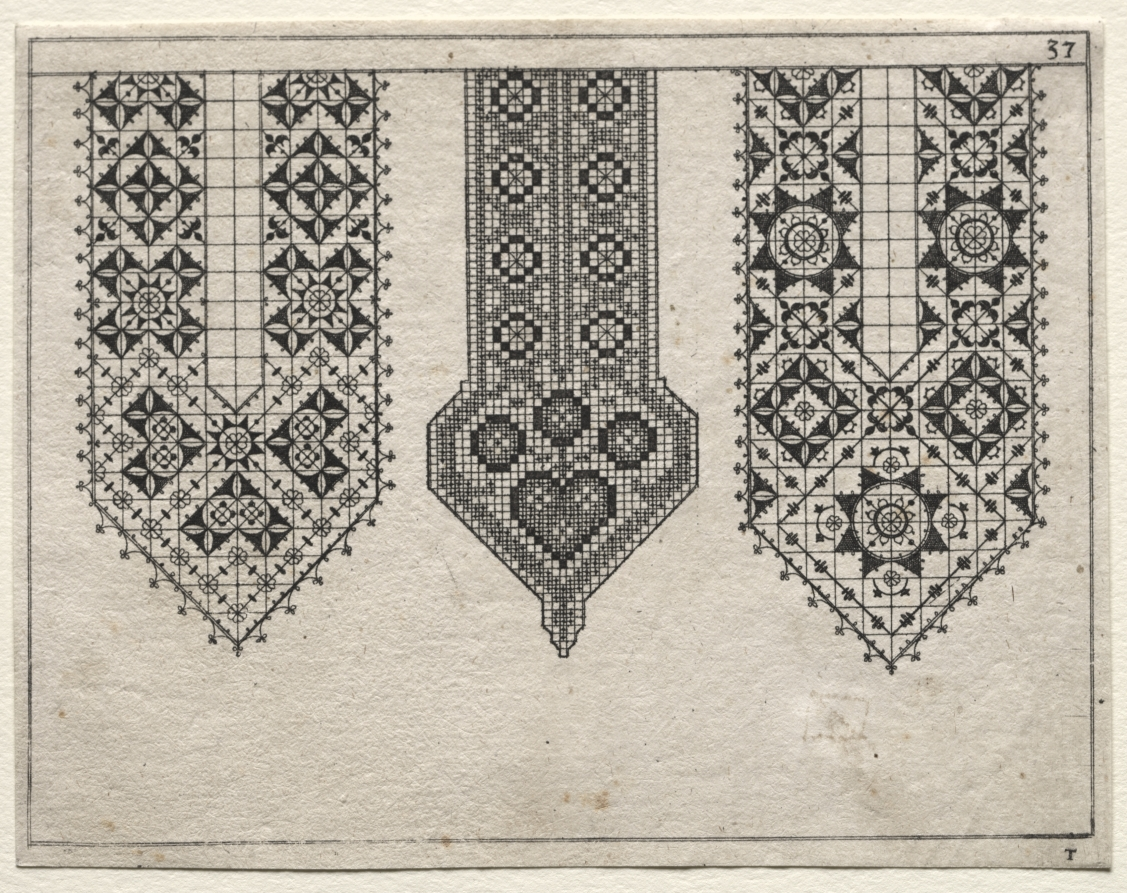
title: Plate 37 from Schon News Modelbuch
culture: Germany, late 16th Century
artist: Hans Sibmacher (German, 1611)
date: 1597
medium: etching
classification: Print